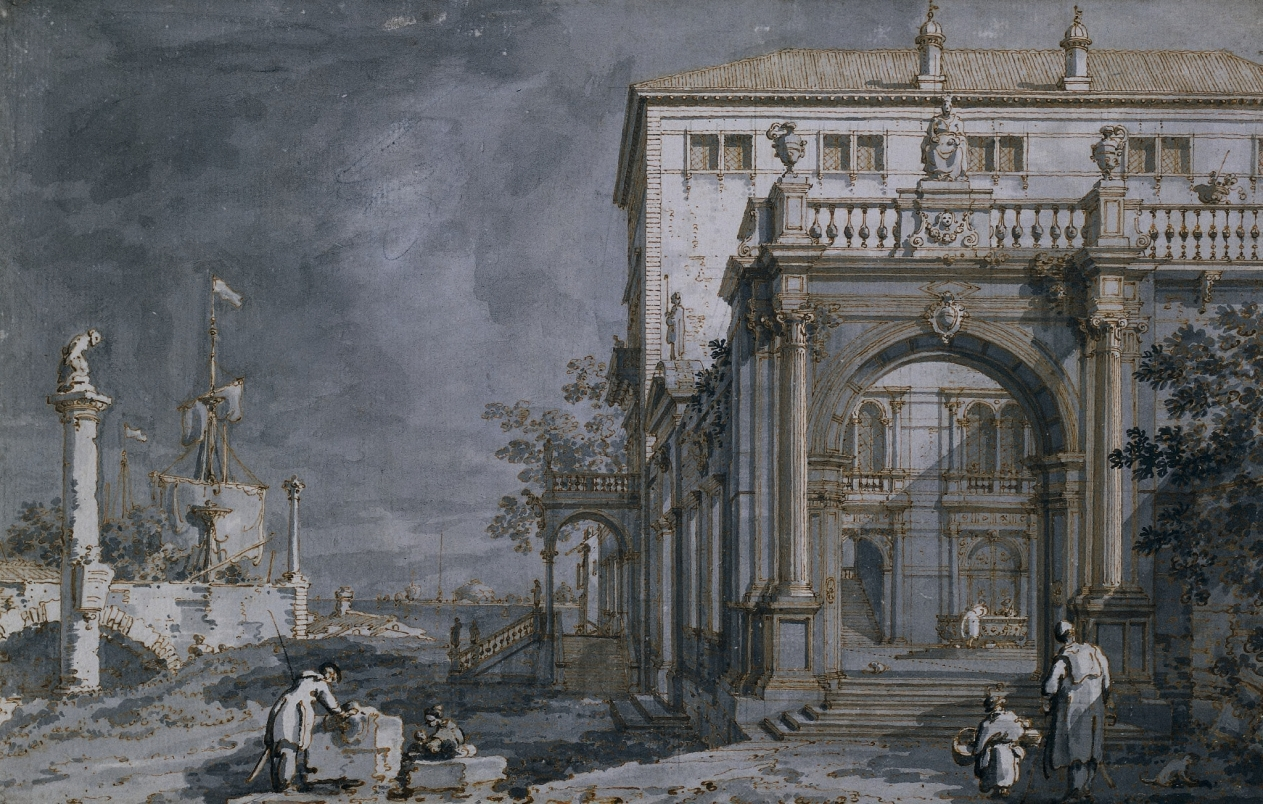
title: Capriccio: A Palace with a Courtyard by the Lagoon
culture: Italy, Venice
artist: Antonio Canaletto (Italian, 1697–1768)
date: c. 1750–55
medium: pen and brown ink and brush and gray and black washes over traces of graphite (?); framing lines in pen and brown and black ink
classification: Drawing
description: Privileged young Europeans embarking on the Grand Tour during the 1700s invariably visited Venice, where they purchased paintings, prints, and drawings to commemorate their trip. Canaletto’s vedute (view paintings) were particularly desirable as mementos of the city. This drawing is a capriccio—an artistic fantasy of architecture and landscape. Canaletto often referred to actual buildings in his capricci, manipulating and combining them to create his invented views. The palatial structure in this composition appropriates the neo-Palladian portal to the Palazzo Tasca in Venice; however, the lagoon, peasant figures, and architectural details are artifice. Traces of Canaletto’s graphite underdrawing are visible in the cloudy sky, as are the black chalk lines he carefully ruled in before delineating the building with pen and brush. The brown ink outlines of the composition contrast with Canaletto’s tints of transparent gray wash, which animate the drawing through their effect of flickering sunlight. Though three large, painted capricci paintings share compositional elements with this drawing, it is unclear whether it is a preliminary study, or an independent work of art.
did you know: The round building in the distance, across the lagoon, is reminiscent of the Pantheon—a former Roman temple located in Rome.